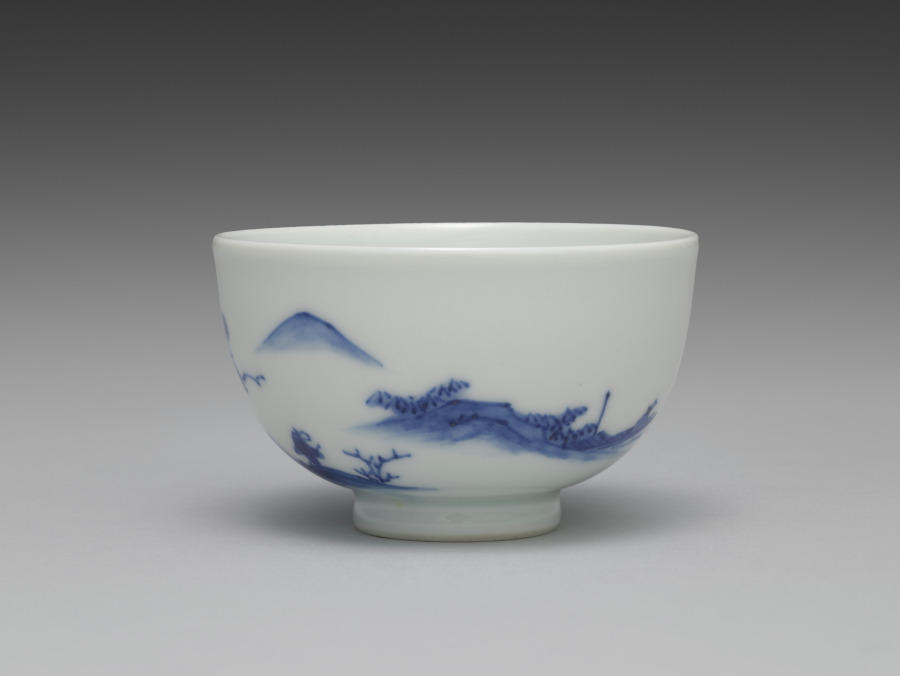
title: Teacup from Tea Set with Chinese Landscape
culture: Japan, Meiji period (1868–1912)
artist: Seifū Yohei III (Japanese, 1851–1914)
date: 1893–1914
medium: Porcelain with underglaze blue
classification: Ceramic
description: The theme of this sencha tea set is the Chinese scholar-recluse in an idyllic landscape. Each of the five teacups has a landscape with an architectural structure and some human activity. This tea set has a side-handled pot called a kyūsu, used for steeping, straining, and serving tea. Unlike some others, this set also has a yuzamashi, a container used to cool boiled water to just the right temperature for the best flavor when steeping. Seifū Yohei III’s painting teacher, Tanomura Chokunyū (1814–1907), made a visual record of famous sencha events that shows how these kinds of porcelains fit with objects such as a stove and kettle to form a complete set of utensils for tea preparation, and with ensembles of decorative objects meant to inspire creativity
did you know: This teacup shows a man with a staff walking away from a residence toward a boat, loaded with what might be a musical instrument wrapped for travel.